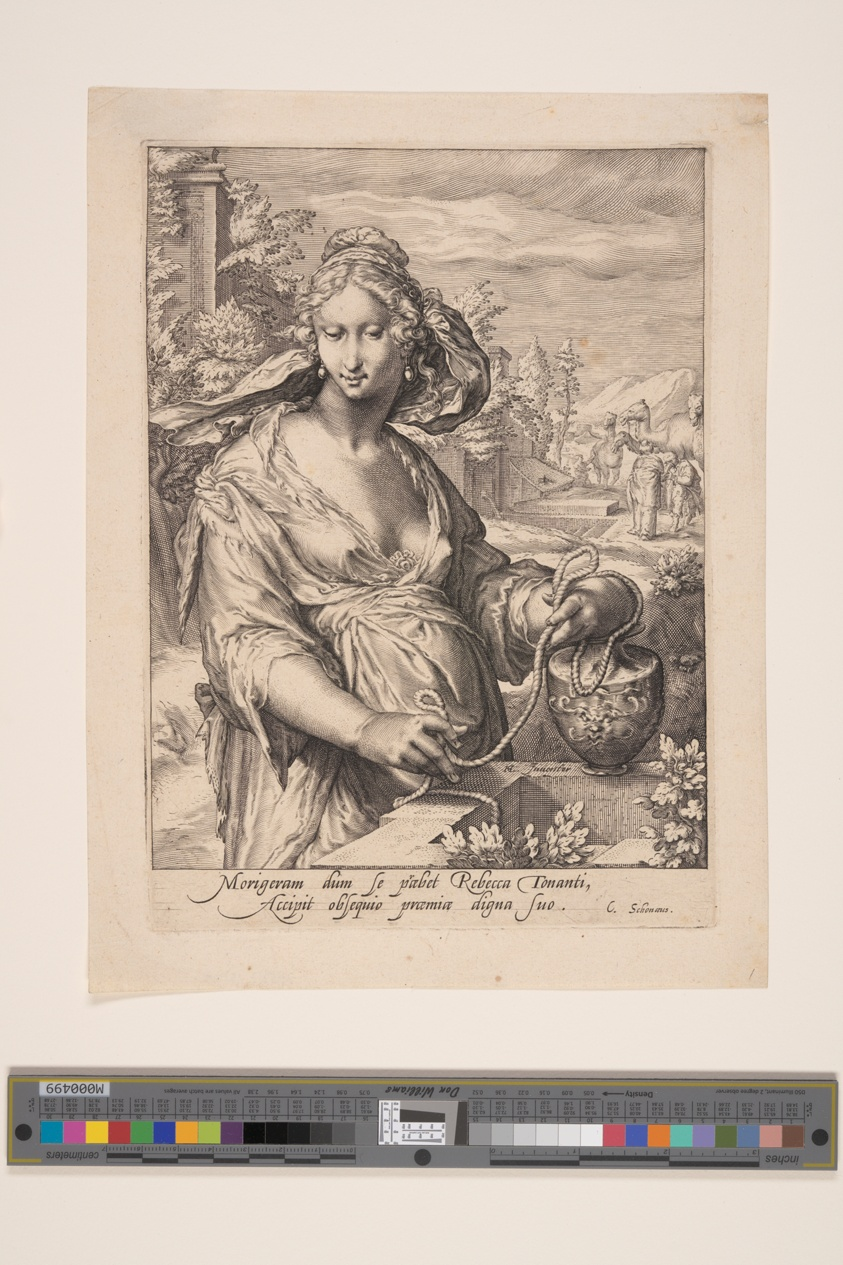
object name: Print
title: Rebecca, from The Wives of the Patriarchs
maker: Jacob Matham (Dutch, 1571–1631); after Hendrick Goltzius (Dutch, 1558–1617)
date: 1597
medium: Engraving on laid paper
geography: Netherlands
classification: print; engraving; paper; prints and drawing